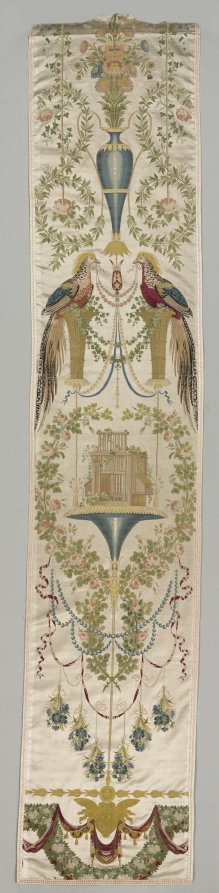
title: Wall Covering, "The Pheasants" from the "Vatican Verdures" Series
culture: France, 18th century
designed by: Jean-Démosthène Dugourc (French, 1749–1825)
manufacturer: Camille Pernon & Cie (French)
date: after 1799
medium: lampas (satin weave and plain weave variant), brocaded, embroidered (chain, satin stitches); silk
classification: Textile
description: France developed a thriving silk industry in Lyon with the goal of becoming the fashion center of Europe. Employment soared to some 20,000 workers by the time of the French Revolution in 1789. Designs changed annually, colors established new fashions, and spectacular silks were produced during the late 1700s. Dugourc, an architect who studied in Italy, became a renowned textile designer for Camille Pernon & Cie, purveyors to King Louis XVI (reigned 1774–92). He created this elaborate, balanced composition as part of elegant wall coverings for the Casita del Labrador, near Madrid. Dugourc named the series after frescos by Raphael in the Vatican.